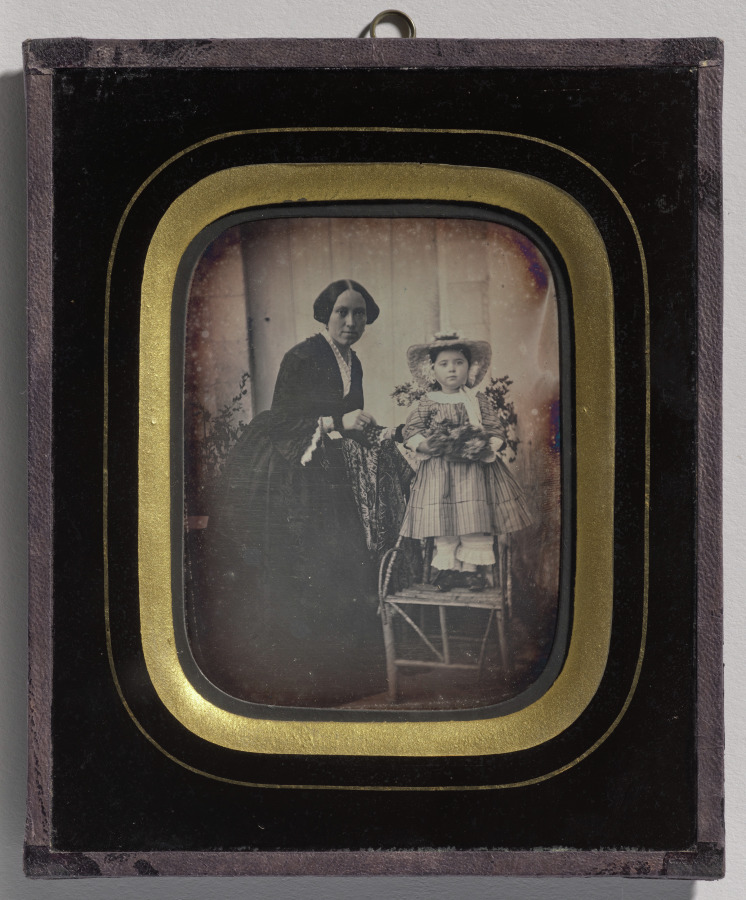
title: Child Standing on a Chair Holding Flowers, with Mother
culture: France, 19th century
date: c. 1855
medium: daguerreotype, quarter-plate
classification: Photograph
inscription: written in pencil on recto of frame:"80581/3"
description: Until the mid-1850s the daguerreotype process was the method preferred by the commercial photographers willing to meet the ever-growing demand for likenesses of family and friends. This daguerreotype captures the patience of a mother and child, who were required to hold their poses for some time during the exposure of the silver-coated copper plate. Only the bouquet of flowers held by the child is slightly blurred. Characteristic of the technique, the details in the image—fabric, facial features, and accessories—are clearly defined.